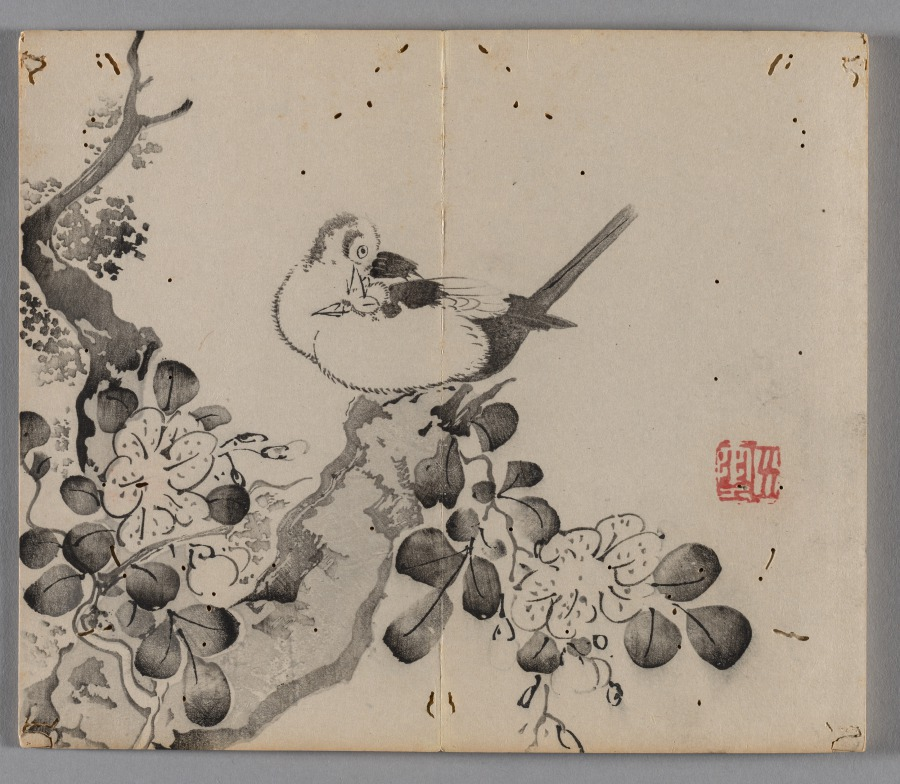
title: Ten Bamboo Studio Painting and Calligraphy Handbook (Shizhuzhai shuhua pu): Birds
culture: China, Qing dynasty (1644-1911)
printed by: Hu Zhengyan (Chinese, c. 1584–1674)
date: 1633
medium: Woodblock-printed book; ink and colors on paper; first edition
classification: Print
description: Color printing reached a level of perfection in the early 1600s, as seen in this Ten Bamboo Studio Collection of Calligraphy and Painting and the Mustard Seed Garden Manual of Painting (printed 1679 and 1701). The painterly quality, precision in registering (aligning) the woodblocks, and harmonious colors made them the most successful color print editions in Chinese history. Both editions were printed and compiled in Nanjing, spread nationwide, and had a great impact on the arts in Japan and Korea.